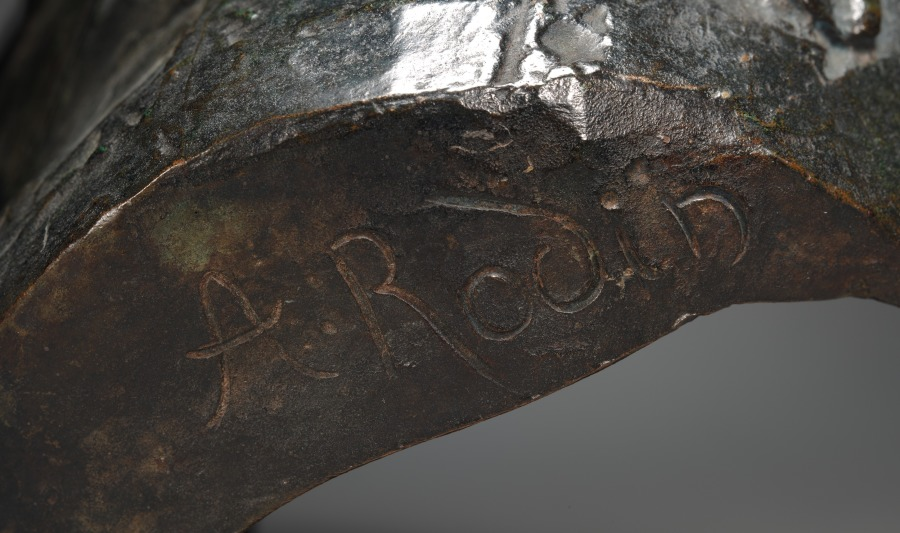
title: Mignon: Bust of Rose Beuret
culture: France, late 19th-early 20th century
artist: Auguste Rodin (French, 1840–1917)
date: c. 1867–1868 (original model)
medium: bronze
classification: Sculpture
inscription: Signed on shoulder to right: "A. Rodin"